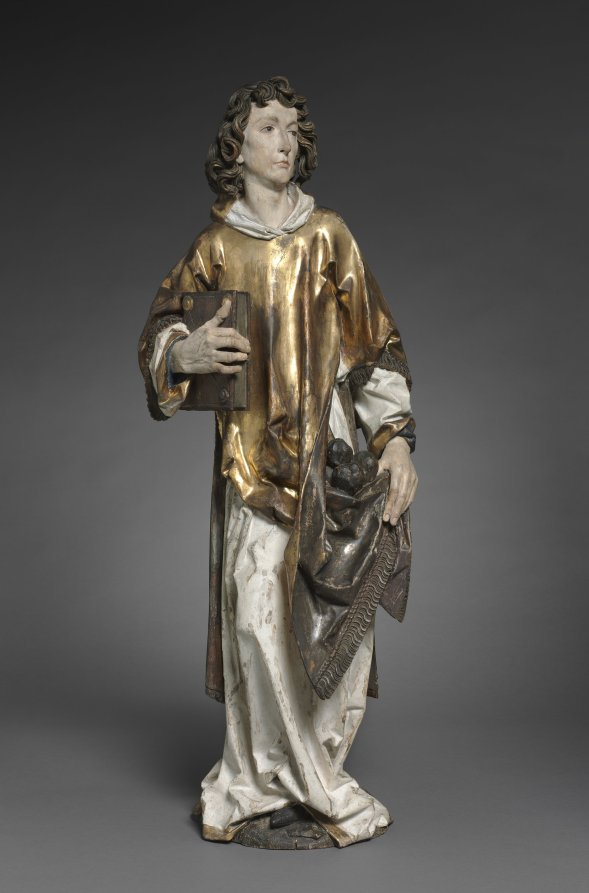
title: Saint Stephen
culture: Germany, Würzburg, 16th century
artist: Tilman Riemenschneider (German, active Würzburg, c. 1460–1531)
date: 1502–8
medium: lindenwood with polychromy and gilding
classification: Sculpture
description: This sculpture, along with that of Saint Lawrence (1959.42) and two others in Germany, are believed to be the remaining fragments of a large altarpiece carved by Riemenschneider for the Dominican convent in Rothenburg in Franconia (demolished in 1813). Saints Stephen and Lawrence both wear the dalmatic to indicate their status as deacons in the early church. Each holds a symbol of his martyrdom; here, Saint Stephen cradles some stones to indicate his death by stoning. Art in Germany through the early 1500s remained firmly anchored in the late Gothic style with its associated interests in realism. Riemenschneider was one of the most prolific and versatile sculptors of this style, a recognized master in both stone and wood. His flourishing workshop employed as many as 40 apprentices in sculpting, woodcarving, and painting. His sculptures are noted for the dreamy, melancholy, and introspective quality in their expressions, as well as their remarkable attention to detail.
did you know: Tilman Riemenschneider (c. 1460–1531) is probably the most famous German sculptor of the period around 1500.